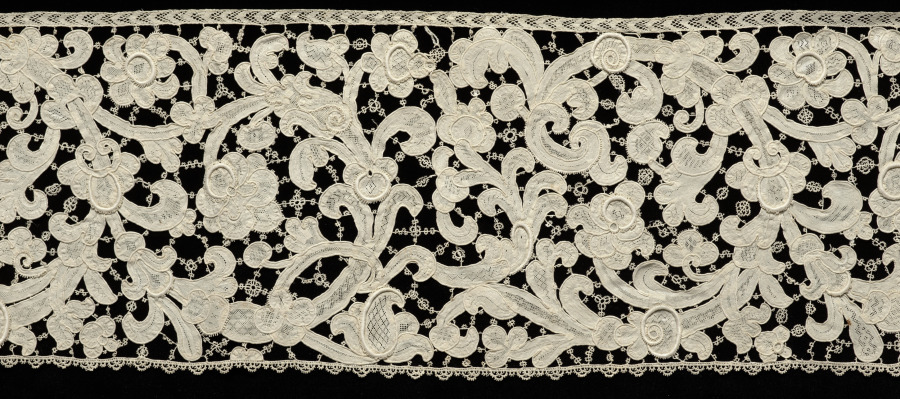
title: Lace Flounce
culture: Italy, Venice, 1600s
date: 1600s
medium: Needle lace (Venetian Raised Point) with Rosaline ground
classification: Lace